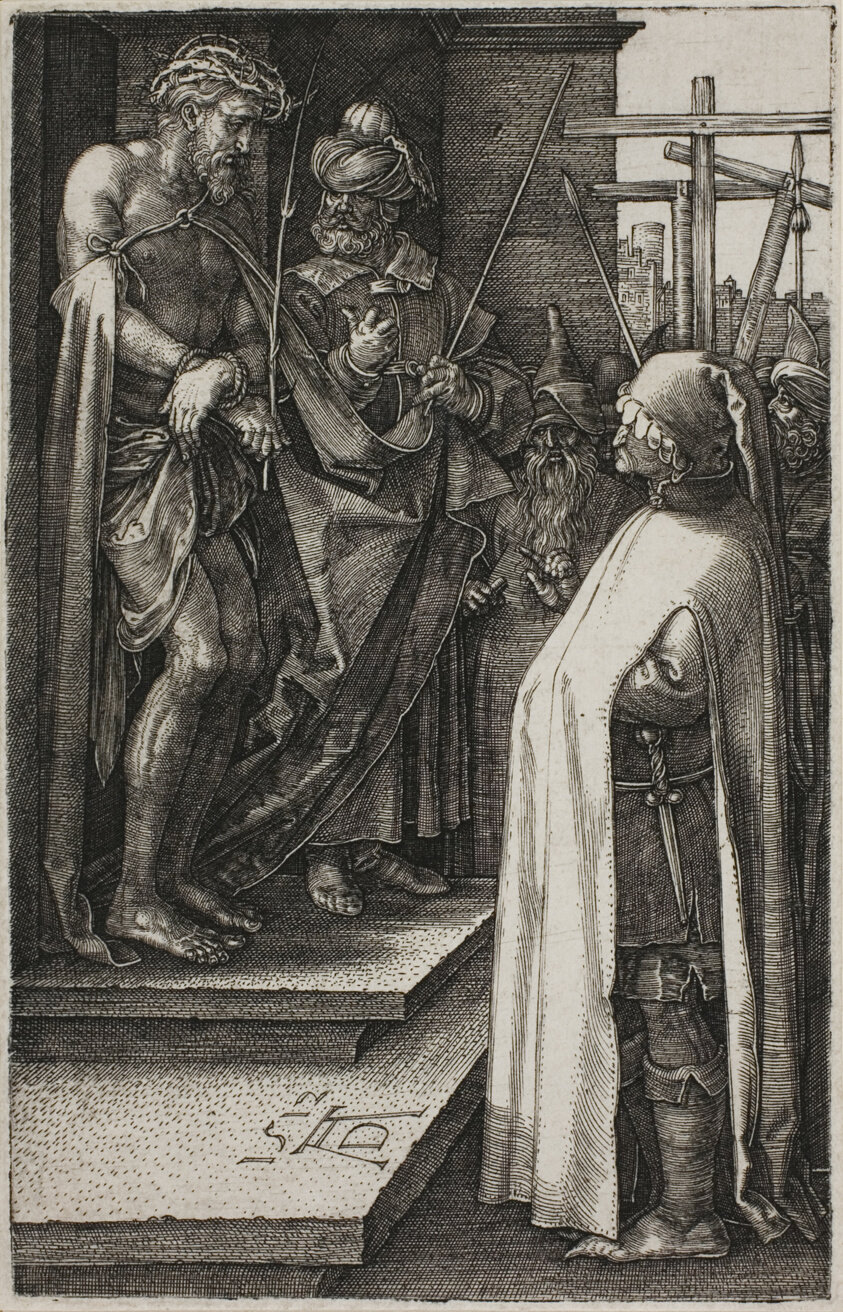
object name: Print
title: Ecce Homo, from The Engraved Passion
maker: Albrecht Dürer (German, 1471-1528)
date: 1512, published 1513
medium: Engraving in black on ivory laid paper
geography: Germany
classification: engraving; print; prints and drawing; paper